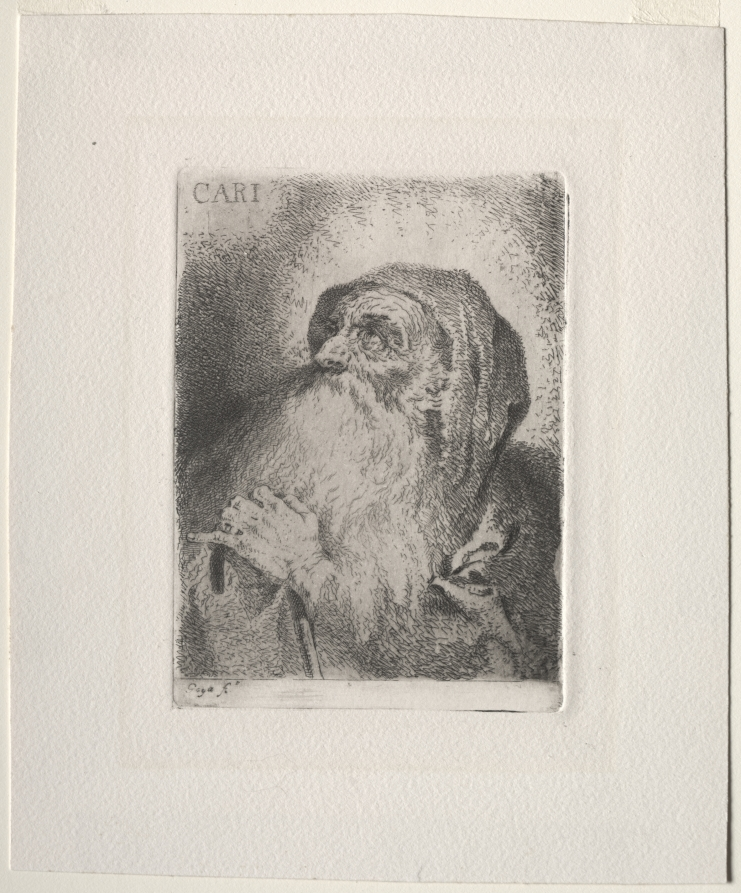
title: San Francisco de Paula (Caritas)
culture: Spain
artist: Francisco de Goya (Spanish, 1746–1828)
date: 1780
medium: etching and drypoint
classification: Print